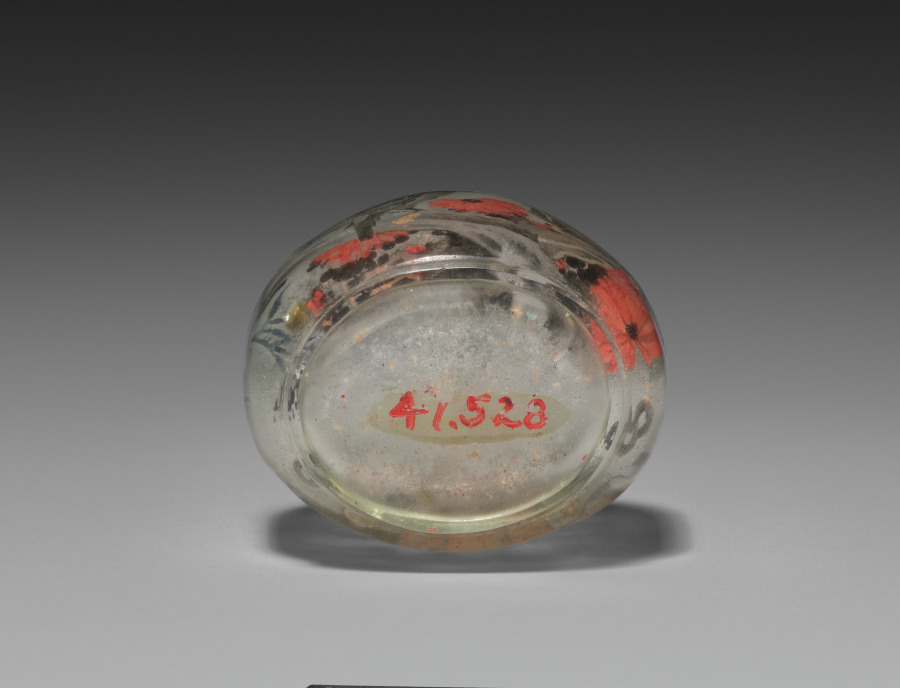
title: Snuff Bottle with Stopper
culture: China, Qing dynasty (1644–1911), Qianlong reign (1736–95)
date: 1736–95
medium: crystal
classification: Stone